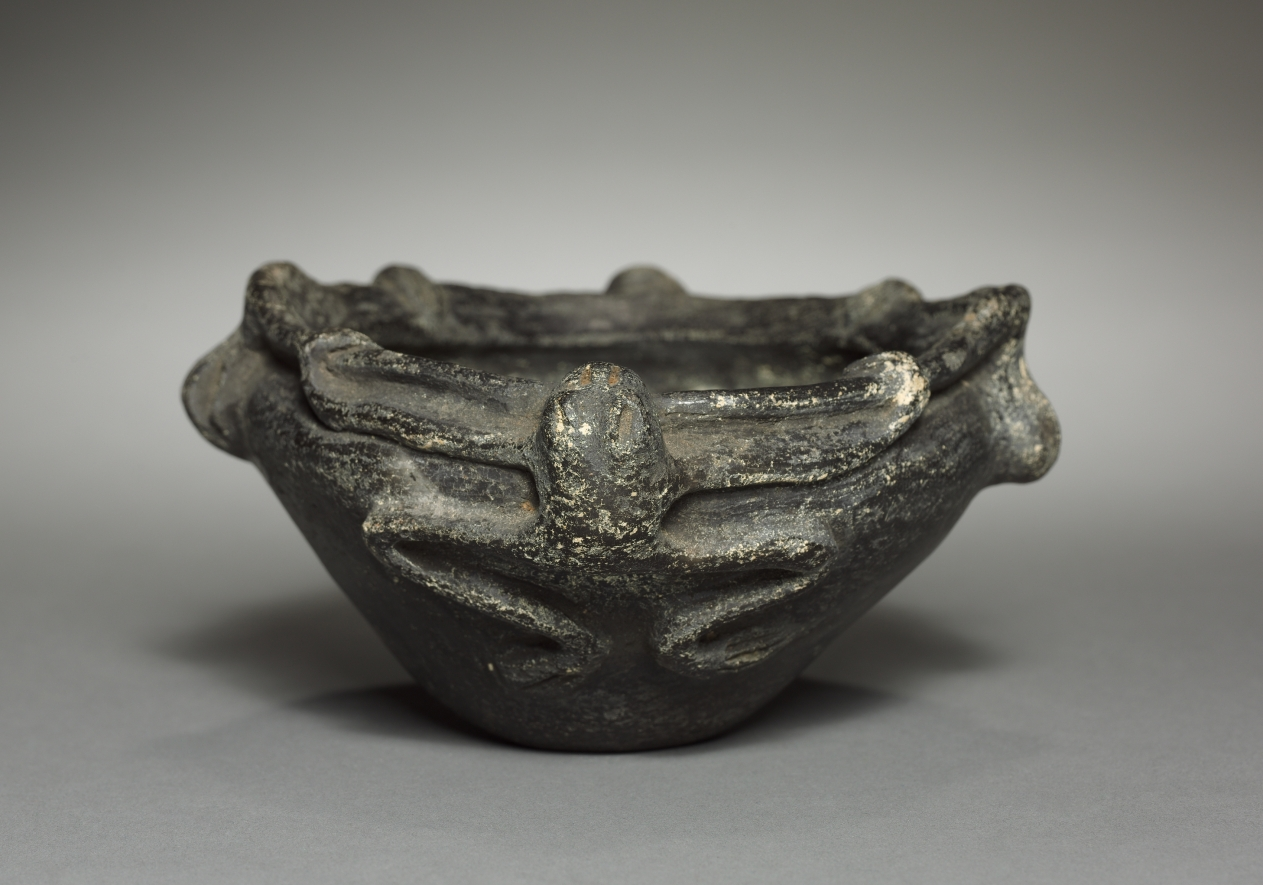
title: Bowl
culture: Colombia, 19th-20th century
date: before 1921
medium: black ware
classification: Ceramic